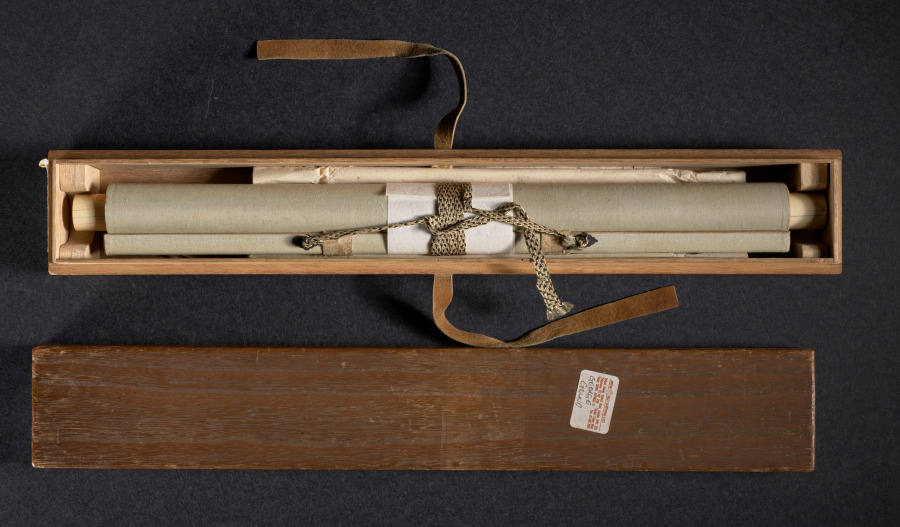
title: Coastal Landscape in the Haboku Style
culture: Japan, Muromachi period (1392–1573)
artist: Keison (Japanese, active late 15th to early 16th century)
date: late 1400s–early 1500s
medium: hanging scroll, ink on paper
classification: Painting